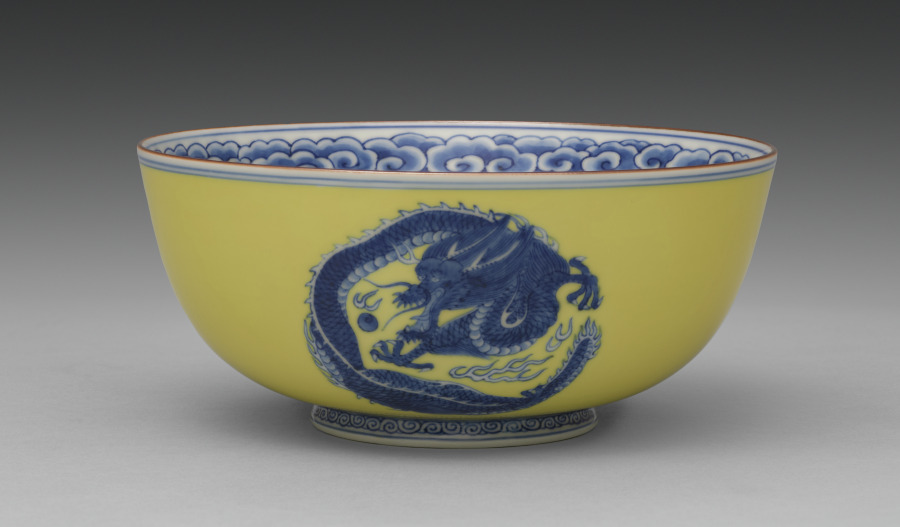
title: Bowl with Dragon Roundels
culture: Japan, Meiji period (1868–1912)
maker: Seifū Yohei III (Japanese, 1851–1914)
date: 1897–1914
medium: Porcelain with underglaze blue, iron oxide, and yellow glaze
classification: Ceramic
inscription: 清風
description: While this bowl has no box, it is attributed to Yohei III based in part on the style of the signature on its base. Below the rim, the bowl’s interior has a ring of clouds in underglaze blue. On the outside, bright yellow is combined with roundels of dragons capturing flaming jewels, painted under the glaze in blue, while the inside has a single dragon roundel in underglaze blue against a white ground. The work’s bold decorative scheme is more in keeping with what might be expected from the high-output studio of Miyagawa Kozan in Yokohama, whose products were designed for mass appeal. A similar bowl is in the collection of the Museum of Ceramic Art, Hyogo.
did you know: Seifū Yohei III was inspired by the Chinese mythical animals and motifs with magical symbolism—including clouds and fungi—that were common on porcelain objects made at Jingdezhen in China during the Ming dynasty (1368–1644) and then exported around the world.